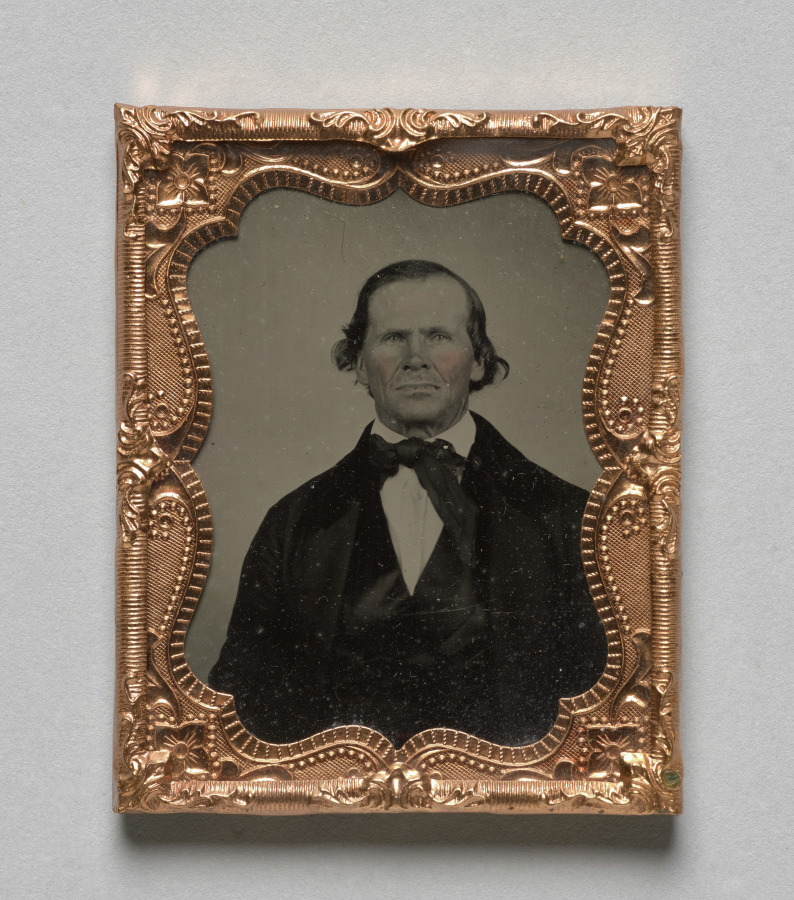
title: Husband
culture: America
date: c. 1860–65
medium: ambrotype, hand-tinted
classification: Photograph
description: You rarely see a smiling portrait from the mid-19th century. Having your photograph taken was a serious and rare endeavor, plus it was difficult to hold any animated expression long enough for the exposure times required by the early processes. Sitters were instructed to find ways to keep from moving, such as clasping their hands. The woman here has taken the photographers’ cautions to an extreme, resulting in a tense and unflattering portrait.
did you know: In the early decades of photography, many people did not know how to pose for the camera.